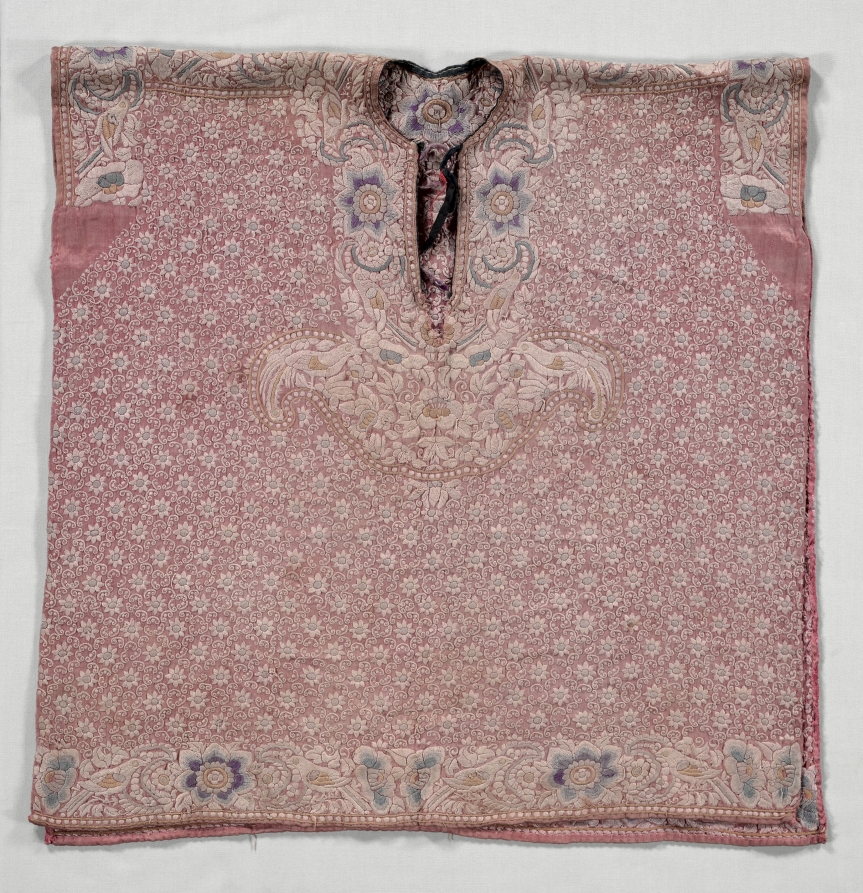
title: Blouse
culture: China, Qing dynasty (1644-1911)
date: 1800s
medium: Silk; embroidered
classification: Garment